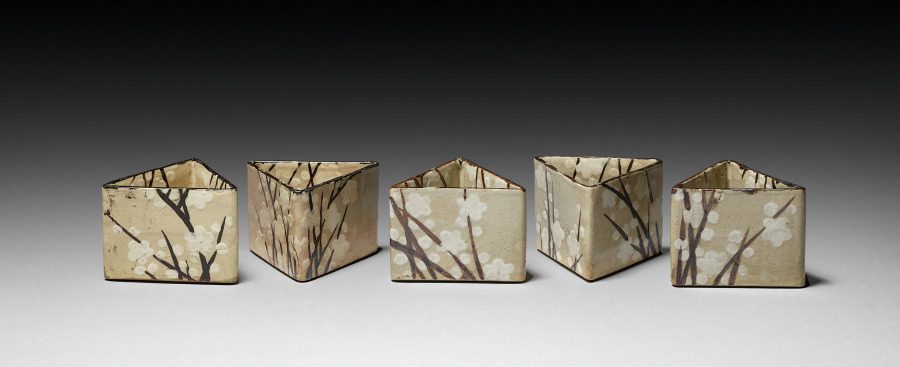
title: Set of Five Serving Bowls (Mukozuke) with Prunus Design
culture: Japan, Edo period (1615–1868)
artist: school of Ogata Kenzan (Japanese, 1663–1743)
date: 1700s-1800s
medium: Kyoto Ware: stoneware with underglaze iron oxide and slip decoration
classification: Ceramic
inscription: signature on bottom, 3 characters in brown iron.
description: Note the rough, tan, clay bodies of these bowls with their deliberate irregularities. The design of branches was first painted in a black iron oxide, then the blossoms and buds in a white slip, followed by the application of a very thin transparent overglaze.